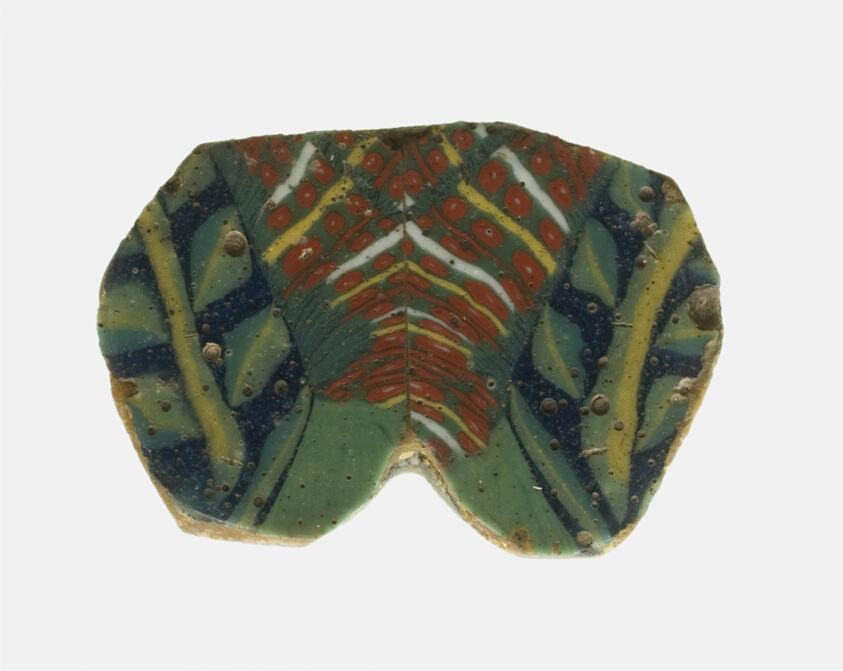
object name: Decorative Arts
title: Fragment of an Inlay Depicting a Fish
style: greco-roman (egyptian), roman (ancient, style or period), egyptian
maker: Egyptian or Roman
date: Ptolemaic Period–Roman Period, (1st century BCE–1st century CE)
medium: Glass, mosaic technique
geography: Roman Empire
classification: fragment; decorative arts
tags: fish